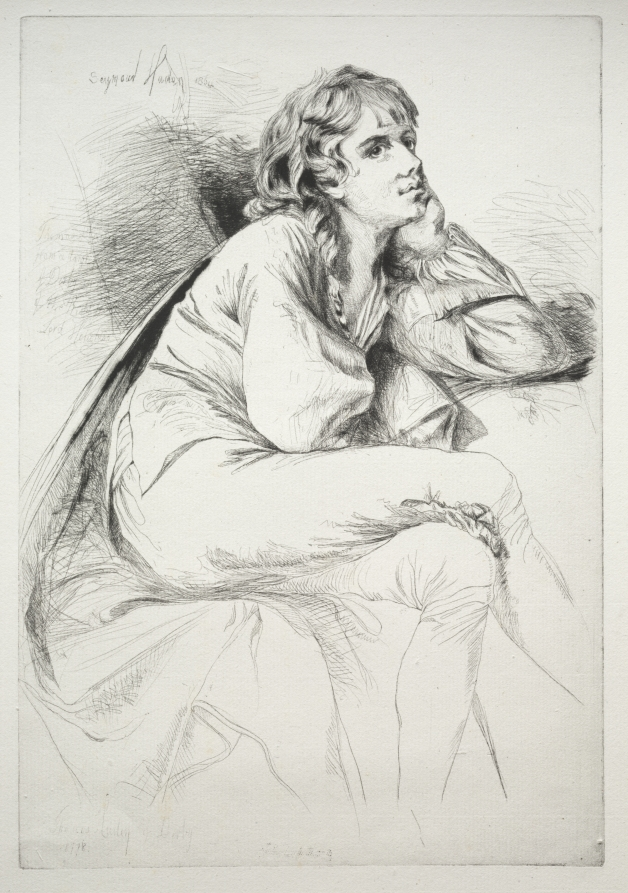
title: Thomas Haden of Derby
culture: England, 19th century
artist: Francis Seymour Haden (British, 1818–1910)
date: 1864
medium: etching and drypoint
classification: Print